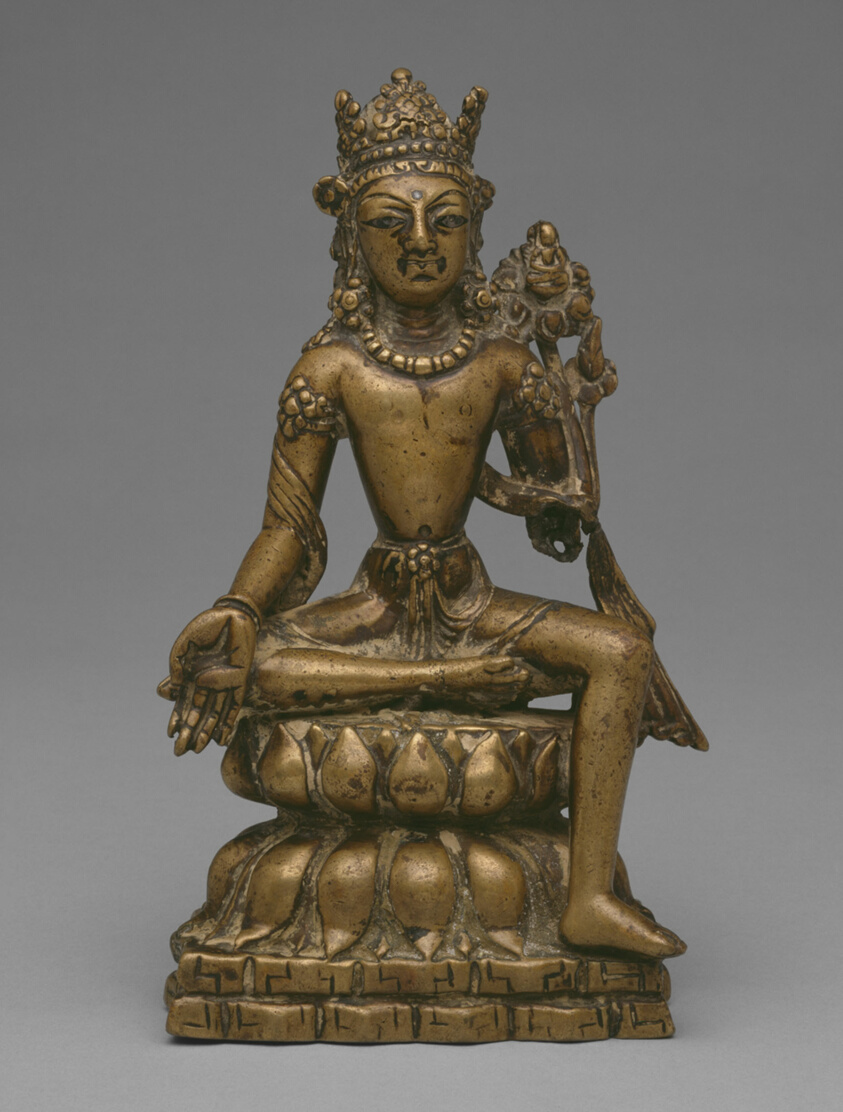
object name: Sculpture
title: Bodhisattva Avalokiteshvara Seated with Hand in Gesture of Gift Giving (Varadamudra)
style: South Asian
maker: Pakistan; Khyber Pakhtunkhwa Province, Swat Valley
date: 8th/9th century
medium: Brass inlaid with silver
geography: Swat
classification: brass; metal; sculpture; asian art